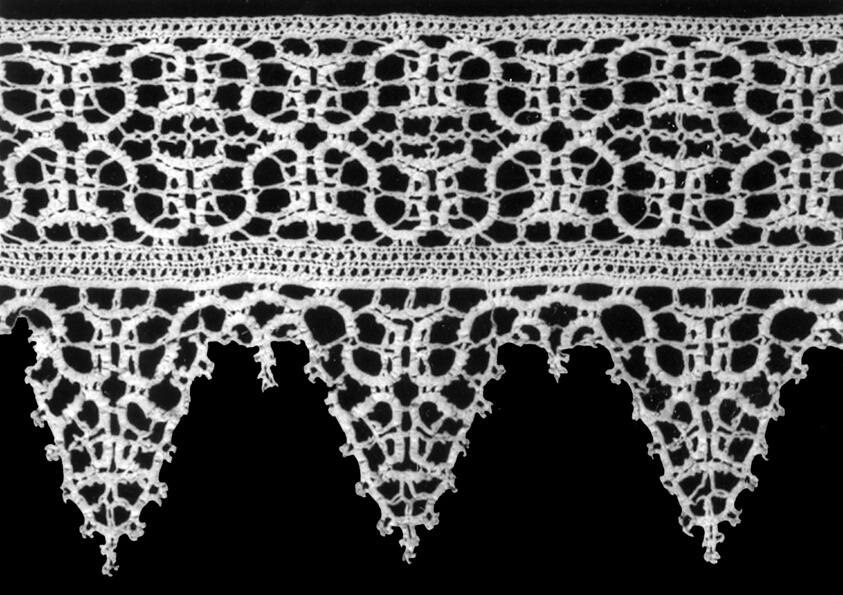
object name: Textile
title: Border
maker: Italy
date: 1850/1900 (based on pattern from first half of 17th century)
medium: Linen, bobbin straight lace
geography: Italy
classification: textile; lace - bobbin